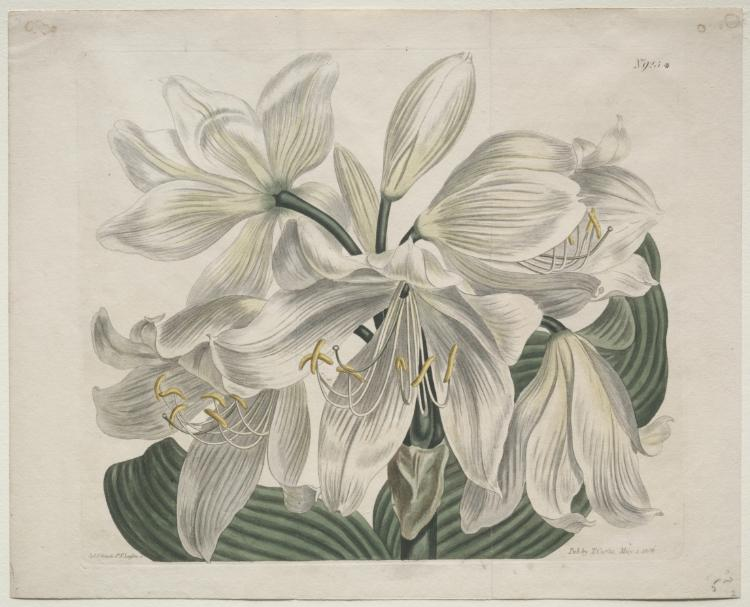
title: The Botanical Magazine or Flower Garden Displayed: White Cape - Coast Lily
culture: England, 19th century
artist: Sydenham Edwards (British, 1768–1819)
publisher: Thomas Curtis (British, 1846–1920)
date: 1806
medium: engraving, hand-colored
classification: Print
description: England was central to botanical concerns in the 18th century. For example, Kew Gardens was founded in 1721 and became a major institution for knowledge about plants from every continent. Interest in gardening led William Curtis to found the specialized magazine Botanical Magazine: or Flower Garden Displayed in 1787. Curtis aimed “to illustrate and describe the most ornamental flowering plants including information on their cultivation and illustrations drawn from living plants and colored as near to nature as the imperfection of color will admit.”